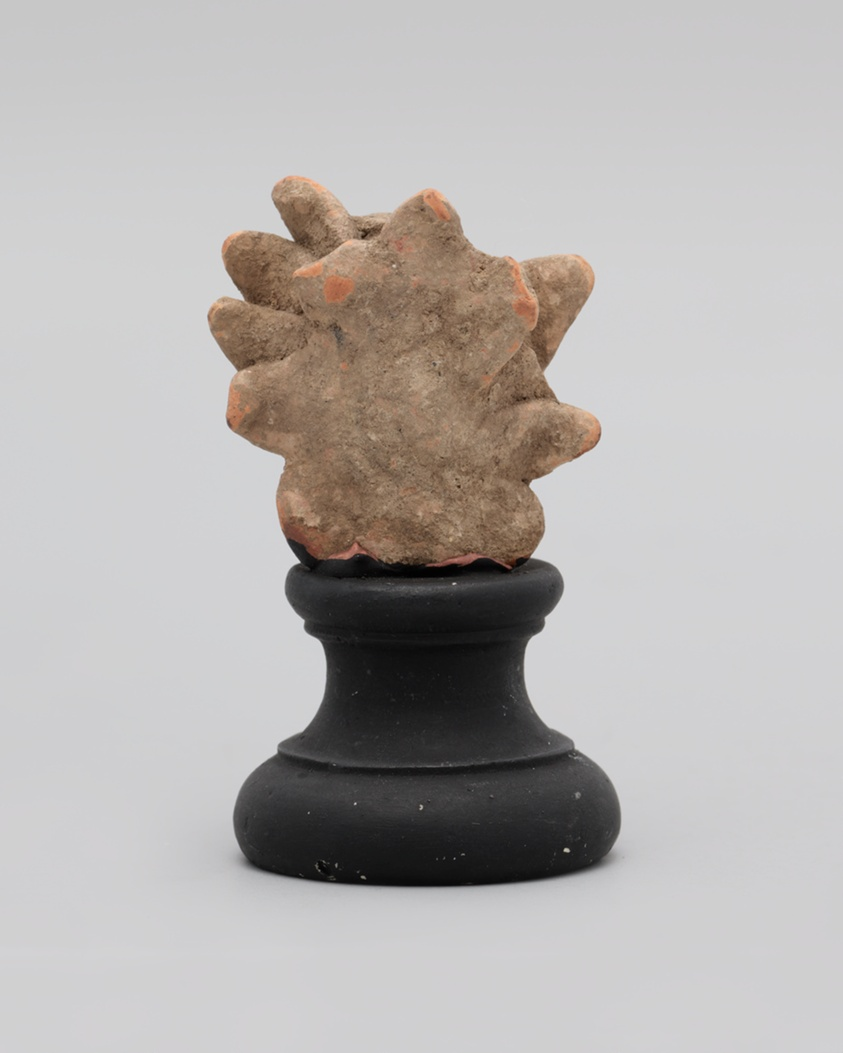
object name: Sculpture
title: Head of a Child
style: greek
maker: Greek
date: 2nd-1st century BCE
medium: terracotta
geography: Greece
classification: earthenware; ceramics; sculpture; ancient art